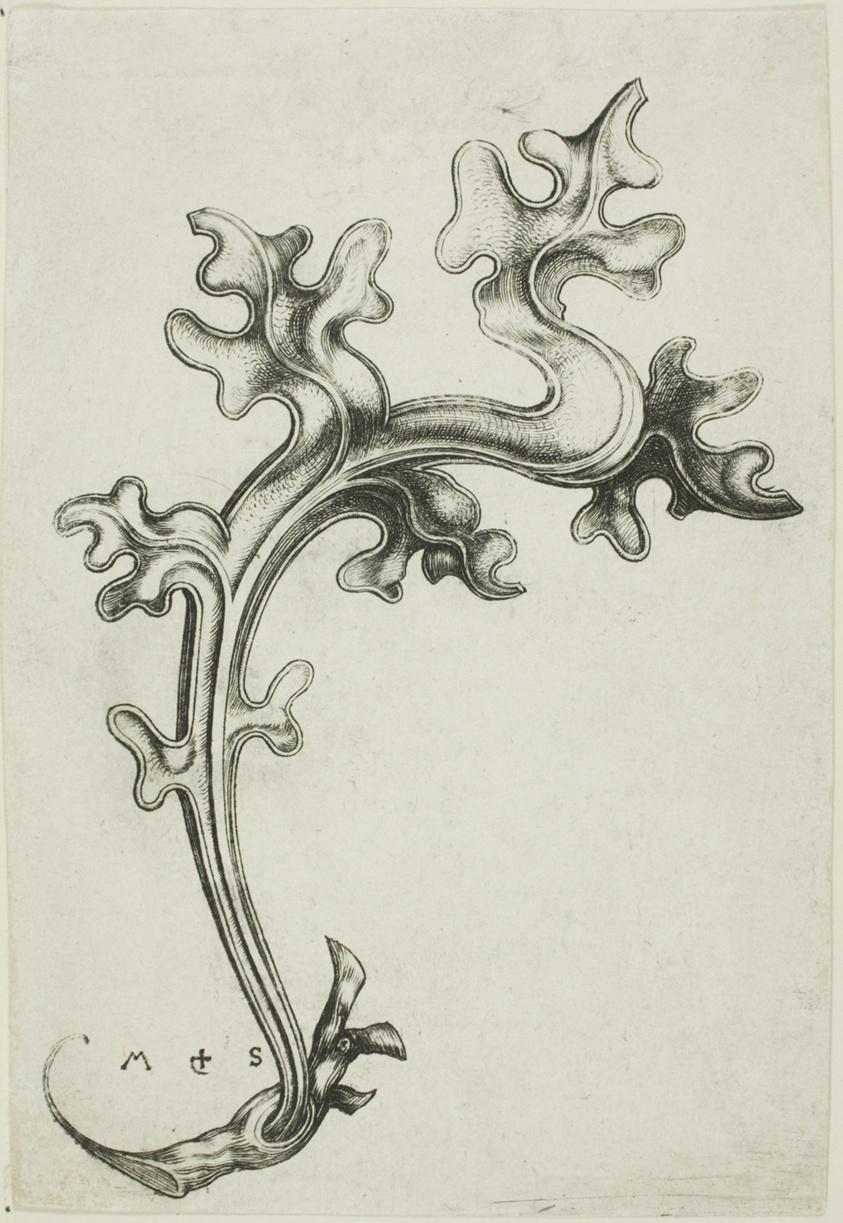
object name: Print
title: Leaf Ornament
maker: Martin Schongauer (German, c. 1430/50-1491)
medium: Engraving on paper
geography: Germany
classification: engraving; print; prints and drawing